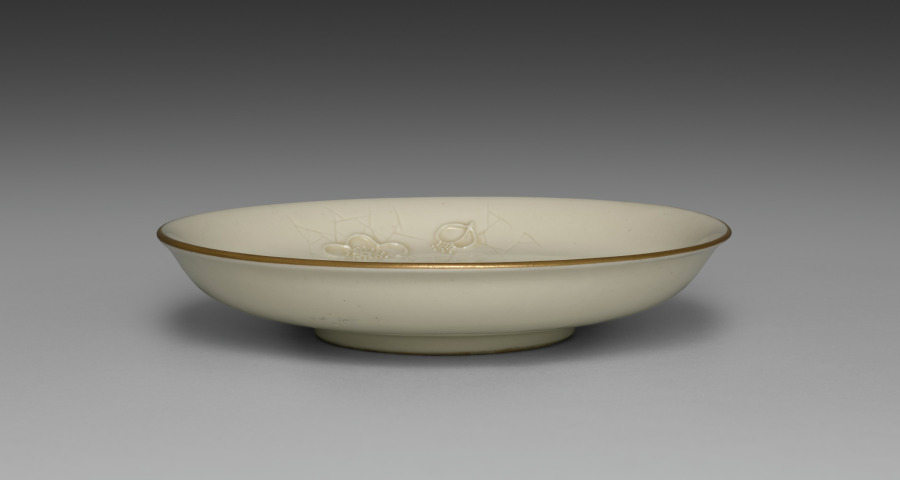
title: Medium-sized Dish from Dining Set with Plum Blossoms and Cracked-Ice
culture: Japan, Meiji period (1868–1912)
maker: Seifū Yohei II (Japanese, 1844–1878)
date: c. 1875–78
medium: Porcelain with molded designs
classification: Ceramic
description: Each item in this set has a delicate low-relief design of flowering plum branches over scattered, intersecting lines meant to resemble the cracked-ice surface of a frozen body of water and is signed on the base in gold pigment. While Yohei II produced many fine works in underglaze blue, like those produced by Kiyomizu Shichibei, he also made works in quite different styles later in his career, from the early 1870 s. In 1873, he was appointed purveyor to the Industrial Center of Kyoto Prefecture, a designation associated with Kyoto’s efforts to reach an international market through the port of Kobe; and from 1875 until his death, he was involved in national-level projects to present Japanese ceramics across the world. It was during this period that Yohei III was apprenticed to Yohei II, and it has been suggested that this set may in fact be an early example of Yohei III’s work, which he signed with his teacher’s name. Decorated with flowers resembling Japanese textile motifs, the set calls to mind the design of Yohei II’s pair of vases with plum blossoms in the Victoria and Albert Museum. Here, the elaborate trees created for a formal public exhibition setting have been translated into the approachable blossoms of the genteel domestic environment. While the designs are consistent across the pieces, each raised flower petal and pistil and each incised line in the ice was done by hand, so the cups, bowls, and dishes are similar yet unique. The bottoms of two boxes once identified the set’s owner, but the information has been deliberately obscured with black ink. However, inscriptions still visible appear to indicate two occasions, once at the end of July 1886 , and once again in June 1916 , when parts of the set were requested from Hokura in Niigata Prefecture. The location corresponds to a neighborhood in the present-day city of Jōetsu. The surname Tsuji 辻 also appears on a paper tag affixed to one of the box cloths. Future research may possibly reveal more about their provenance. A vase by Yohei III in a private collection combines the formal grandeur of the Yohei II vases in the Victoria and Albert Museum with the gentler design of this dining set, placing flowering plum trees against soft, scalloped-edge clouds resembling those in golden screens.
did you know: The dining wares have a creamy white coloration that the four boxes containing them identify as Korean in style.